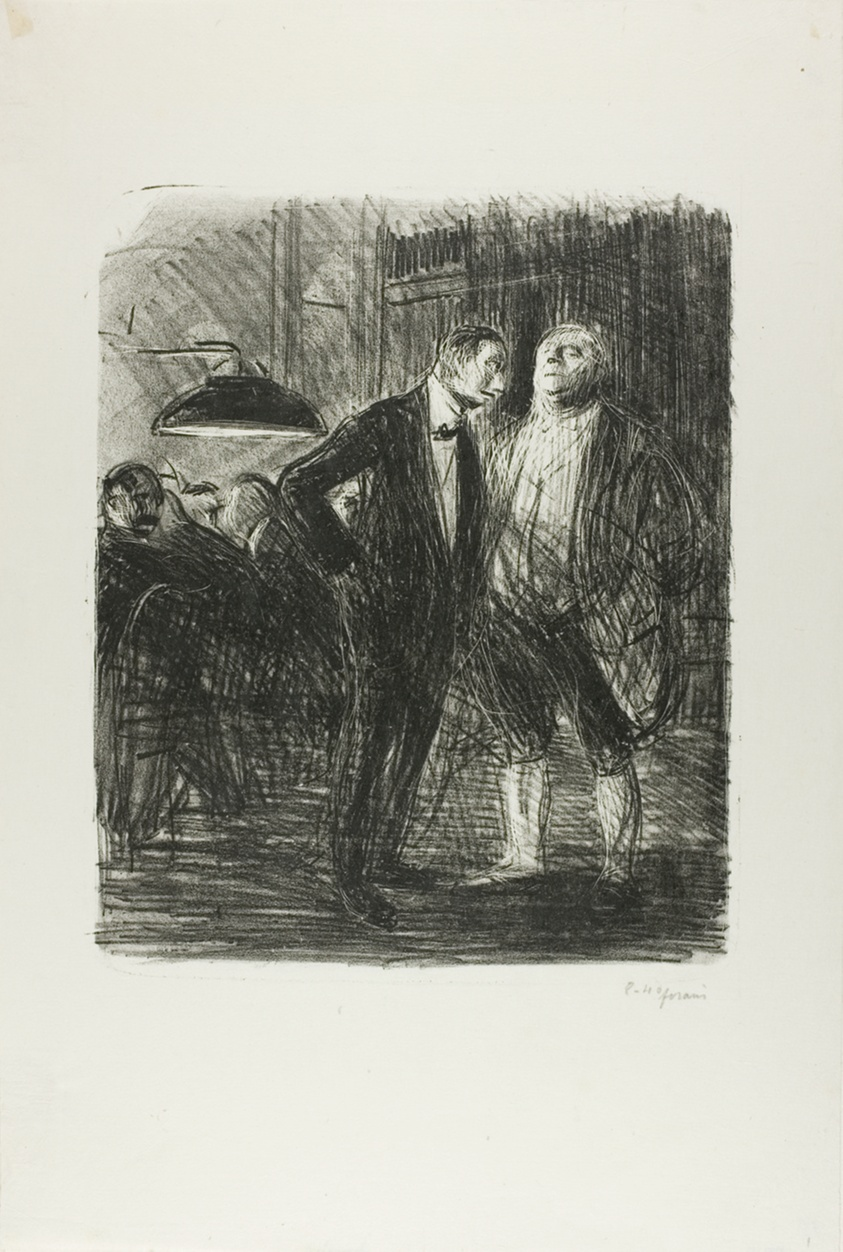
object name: Print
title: Cleared Out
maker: Jean Louis Forain (French, 1852-1931)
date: July 1914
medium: Lithograph on ivory Japanese paper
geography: France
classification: lithograph; print; prints and drawing